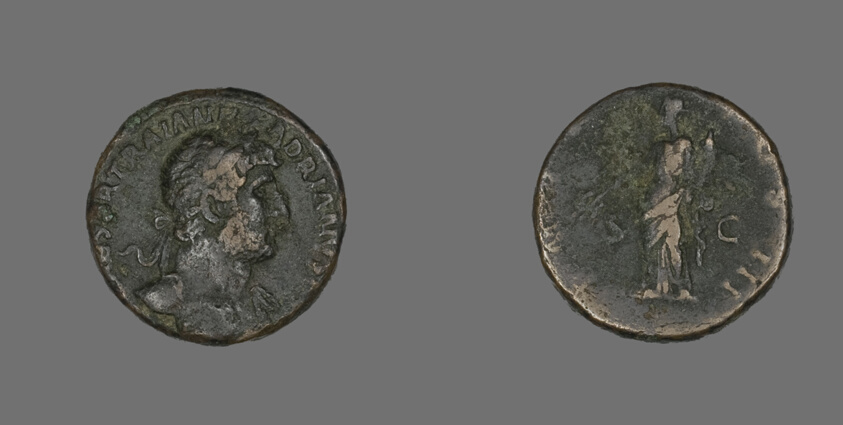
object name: Coin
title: As (Coin) Portraying Emperor Hadrian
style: roman (ancient, style or period)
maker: Roman, minted in Rome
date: 119-125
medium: Bronze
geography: Roman Empire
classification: coin; ancient art